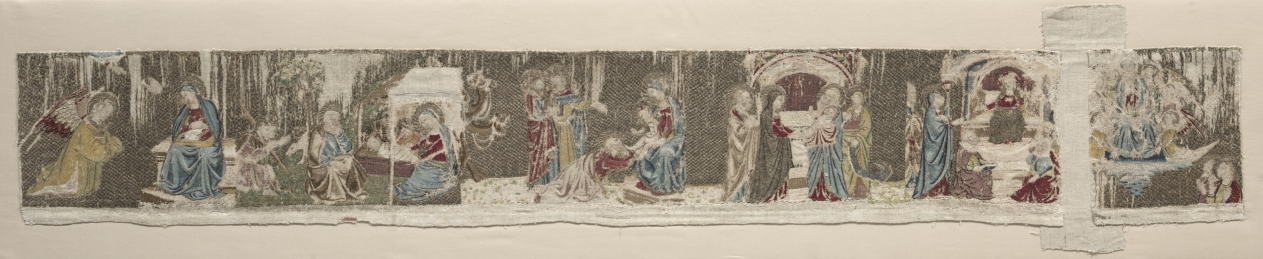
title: Scenes of the Life of the Virgin, from an Altar Frontal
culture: Italy, Florence, 14th century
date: 1330s or 1340s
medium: Silk, gold thread, linen; raised work, embroidery: split, stem, running, fishbone, and couching stitches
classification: Embroidery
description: This rare panel originally hung above a large embroidery that decorated the front of an altar in a church. The narrative begins with the Virgin’s parents and her early life; that panel is now in the Toledo Museum of Art. Cleveland’s portion continues the story with the Annunciation of the Virgin, Adoration of the Shepherds, Adoration of the Magi, Presentation of Christ, Christ among the Doctors, and the Assumption of the Virgin. The Death of the Virgin scene is likely missing. Painters usually sketched designs on stretched linen for embroiderers. Gold thread enriches the background and is secured in place with couching stitches in a small brick pattern.